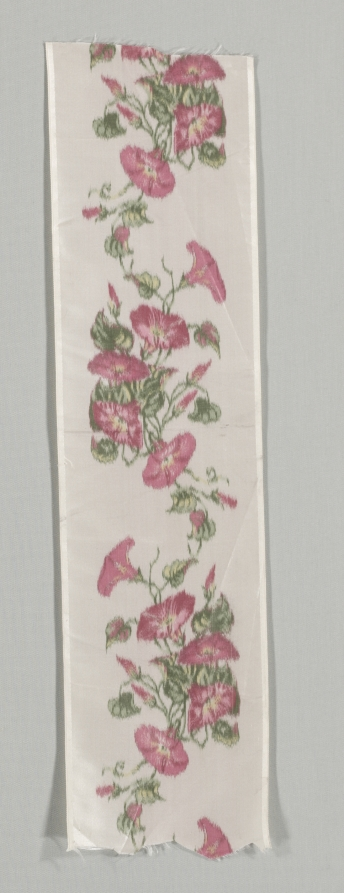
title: Ribbon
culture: France, 19th century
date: 19th century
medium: silk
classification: Textile